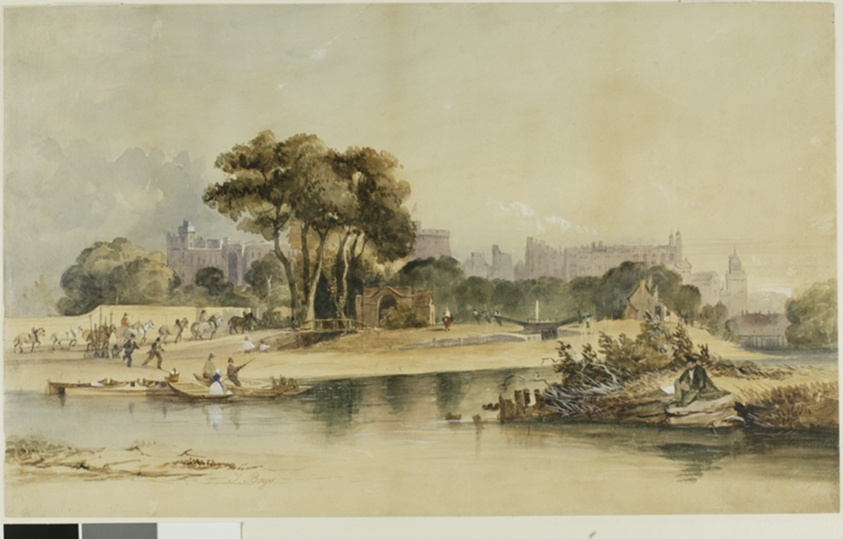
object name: Drawing and Watercolor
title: Environs of Windsor Castle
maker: Thomas Shotter Boys (English, 1803-1874)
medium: Watercolor, with touches of scraping, heightened with white gouache, over traces of graphite, on tan wove paper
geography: England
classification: watercolor; drawings (visual works); prints and drawing